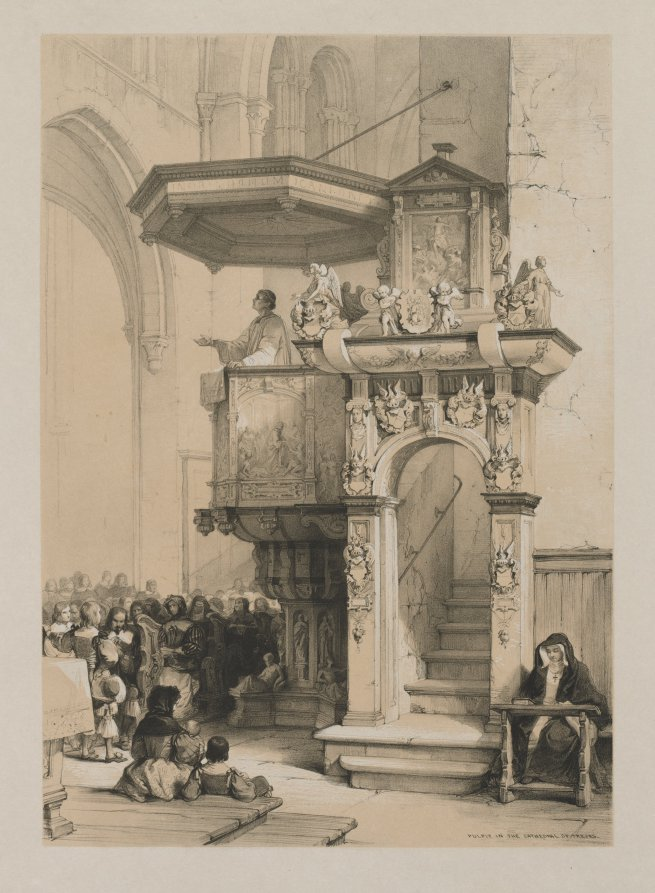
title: Sketches in Belgium and Germany, Volume I: Pulpit in the Cathedral of Treves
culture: England, 19th century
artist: Louis Haghe (British, 1806–1885)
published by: Hodgson & Graves, 6 Pall Mall, London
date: 1840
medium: color lithograph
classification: Print